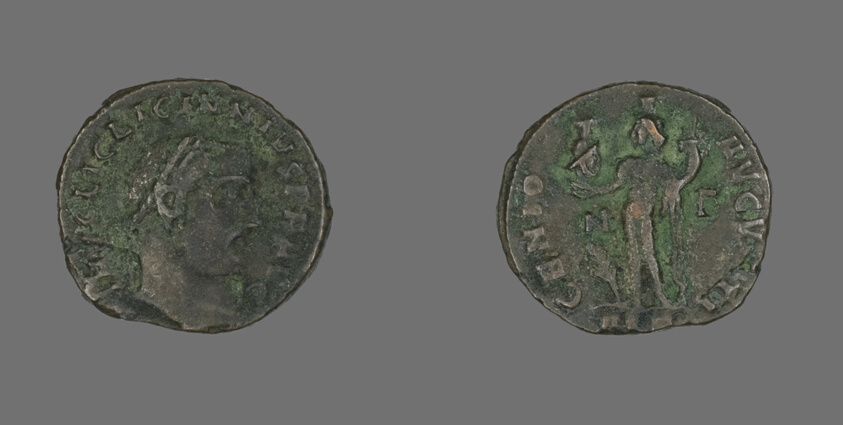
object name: Coin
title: Follis (Coin) Portraying Emperor Licinius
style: roman (ancient, style or period), ancient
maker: Roman, minted in Alexandria, Egypt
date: 312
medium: Bronze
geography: Roman Empire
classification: coin; ancient art